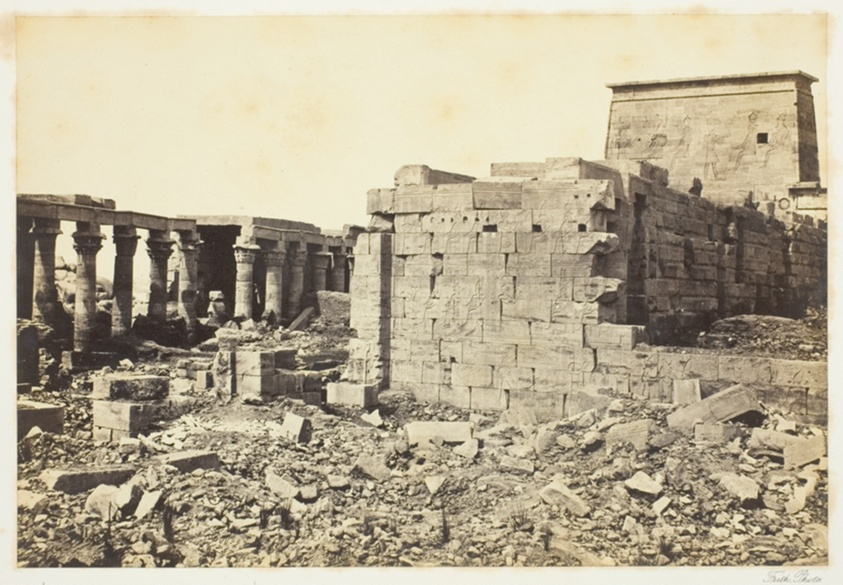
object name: Photograph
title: View on the Island of Philae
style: 19th century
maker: Francis Frith (English, 1822–1898)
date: 1857, printed 1862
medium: Albumen print, No. 23 from the album "Egypt, Palestine and Nubia" (1862)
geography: England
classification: albumen silver print; photographic process; photography; photograph